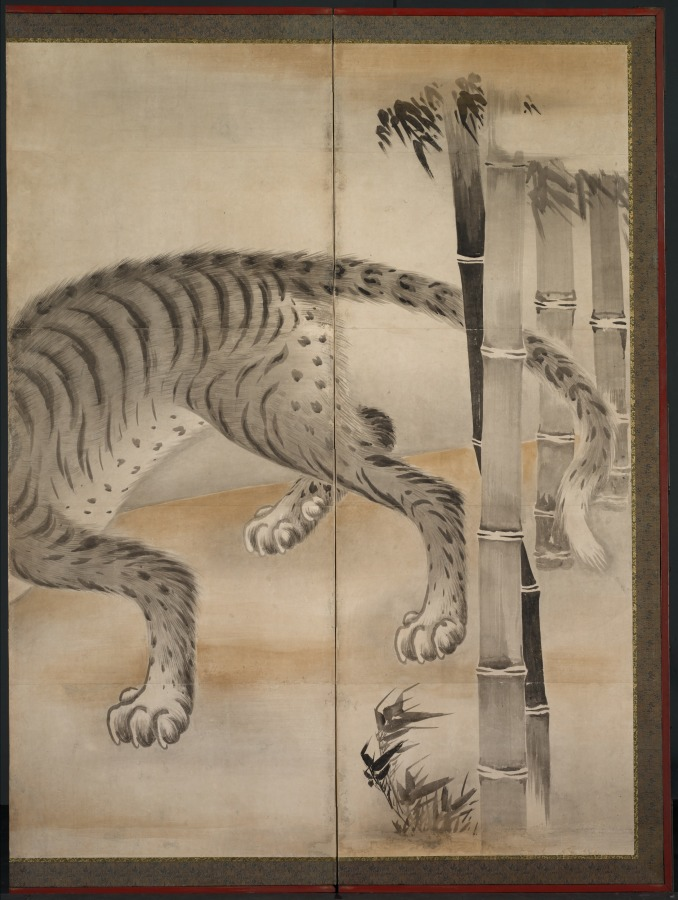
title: Tiger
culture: Japan, Edo period (1615–1868)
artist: attributed to Soga Nichokuan (Japanese)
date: early to mid-1600s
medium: six-panel folding screen; ink, slight color, gold, and silver on paper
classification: Painting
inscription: Signed: Soga Chokuan II (Soga Chokuan ni). Sealed: Hoin (right), Soga Chokuan Hoin (three seals at left) Edo period (1615-1868)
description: A tiger looks upon a waterfall as it prowls out of a bamboo grove on this screen, and a dragon dives through clouds on the right. Tiger and dragon are traditional symbols of the balancing forces in the world, yin (the feminine aspect) and yang (the masculine aspect). This painting has a signature and seals, identifying it as a work by Soga Nichokuan, a painter thought to be from Sakai (near Osaka), and known primarily for his representations of hawk-eagles (kumataka).